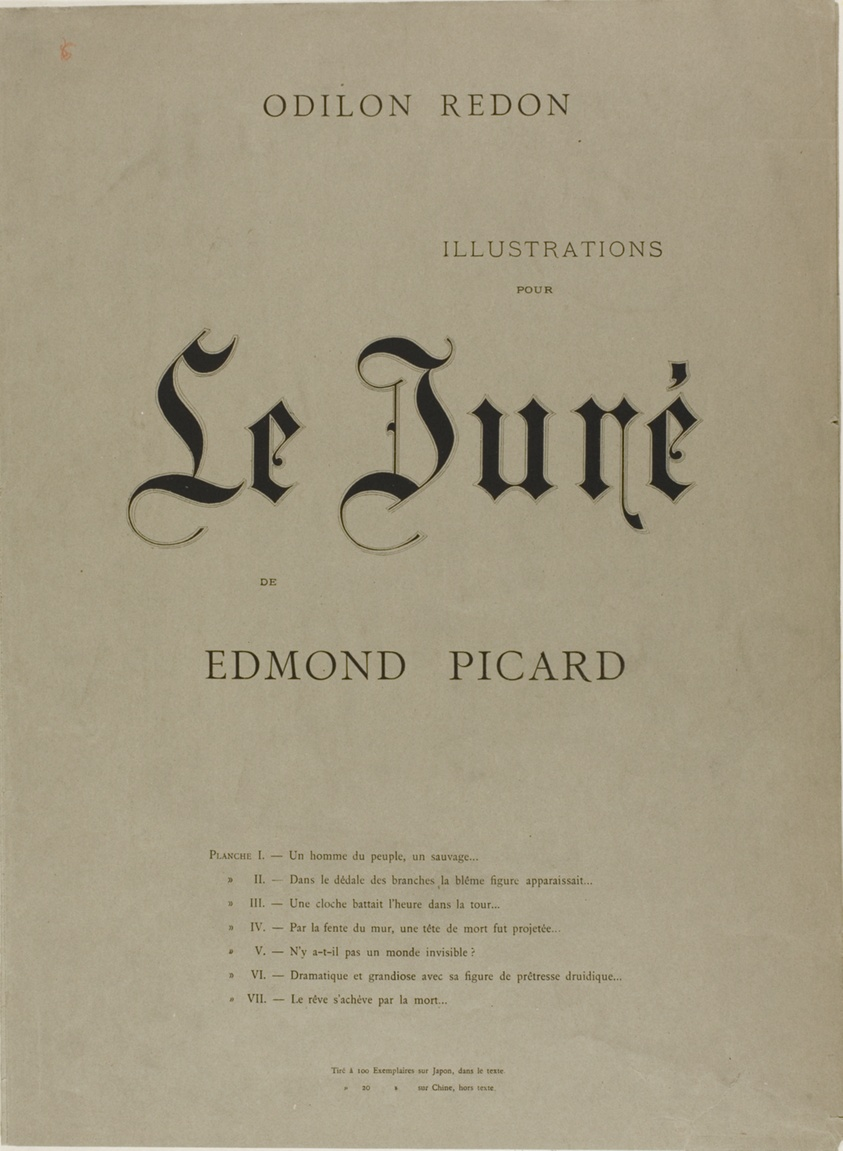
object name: Print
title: Cover for "Le Juré"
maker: Odilon Redon (French, 1840-1916)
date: 1887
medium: Bi-fold portfolio cover with text lithographed in black on gray wove paper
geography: France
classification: lithograph; print; prints and drawing; paper